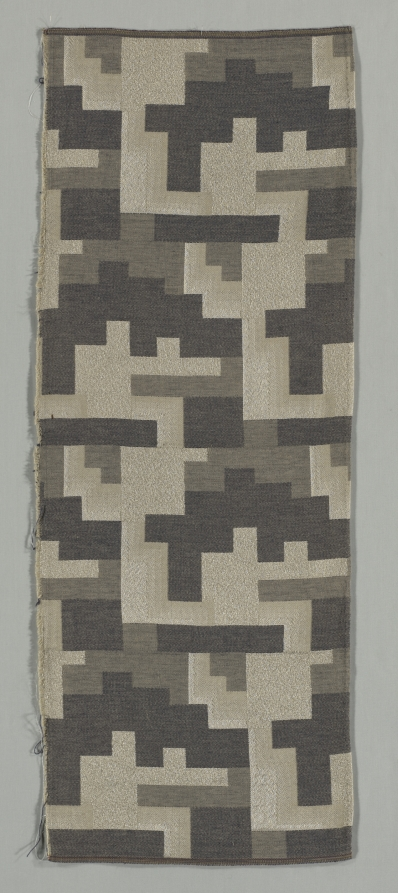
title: French Rayon Textile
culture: France, 20th century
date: 20th century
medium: rayon, cotton, linen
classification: Textile